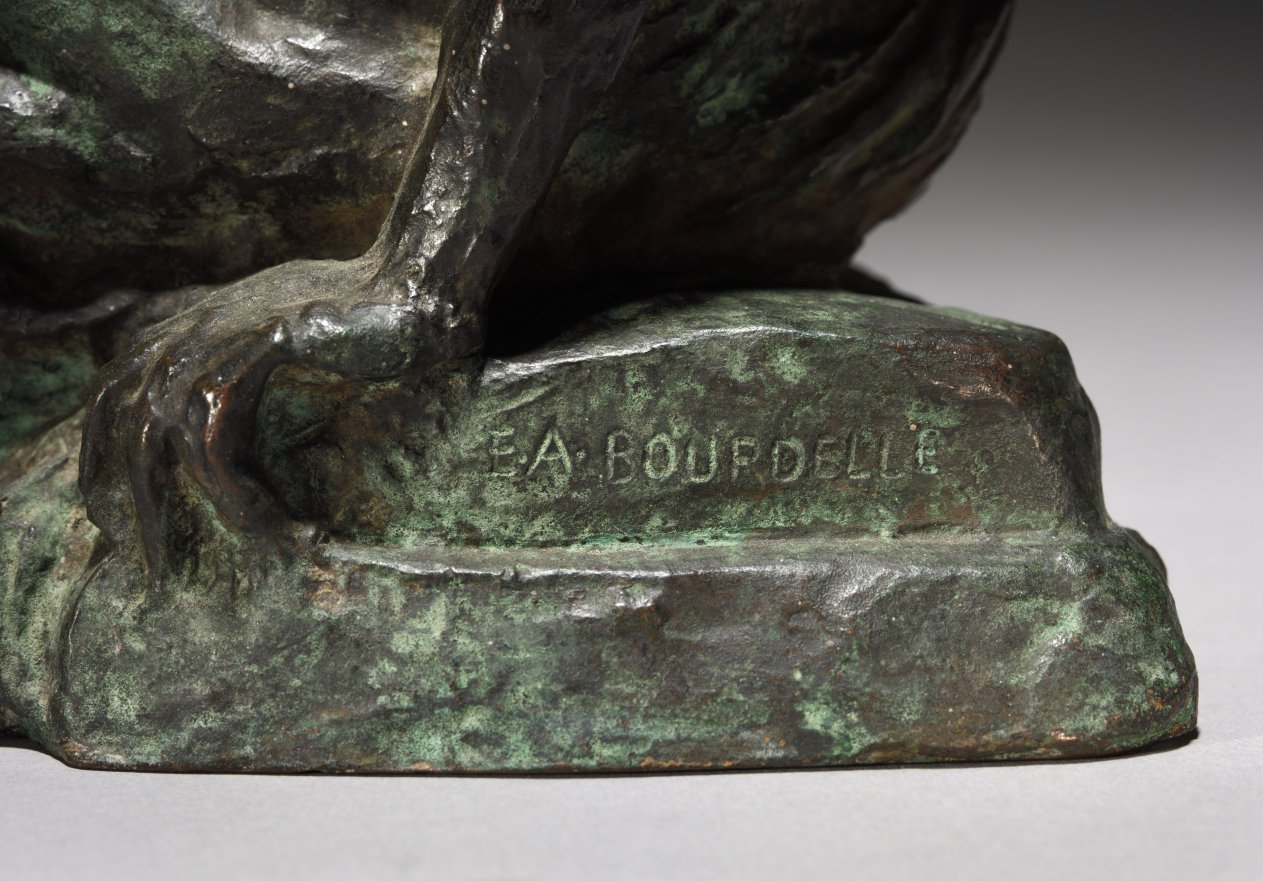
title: Sappho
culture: France, 19th century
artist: Emile Antoine Bourdelle (French, 1861–1929)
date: 1887–1925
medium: bronze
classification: Sculpture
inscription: Inscribed on back: "Alexis Rudier, Fondeur, Paris"; on right side: "E. A. Bourdelle"